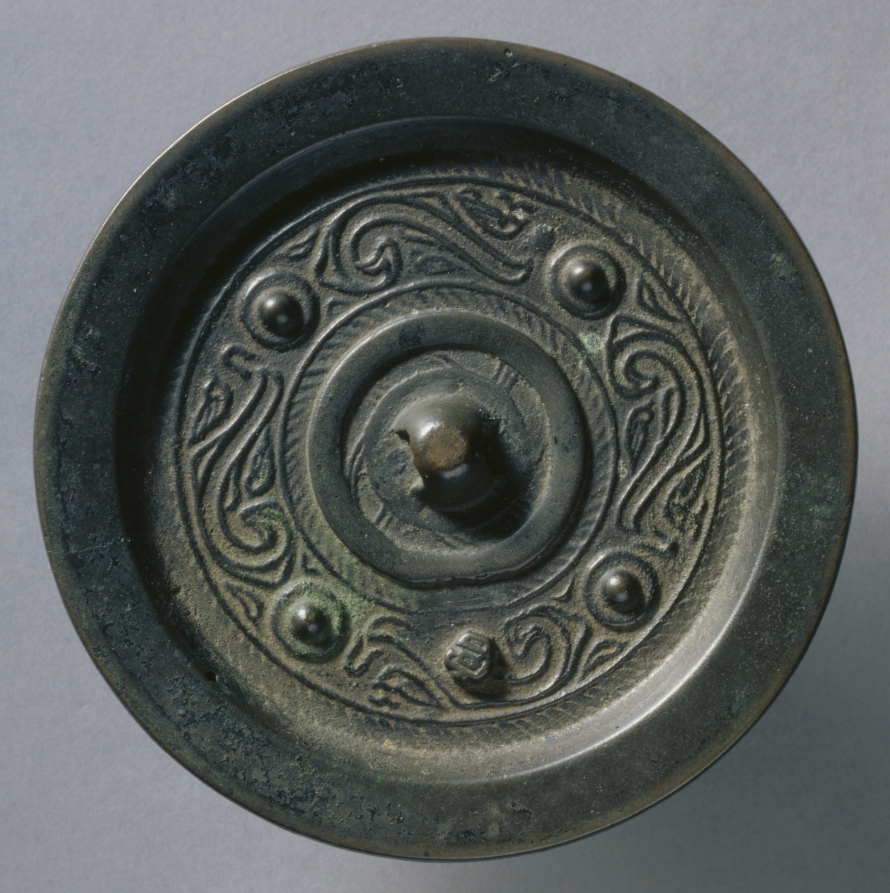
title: Mirror with Four Nipples, Four Quasi-Dragons, and Birds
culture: China, Ming dynasty (1368–1644)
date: mid-1300s–mid-1600s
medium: bronze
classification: Metalwork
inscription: (Gong)